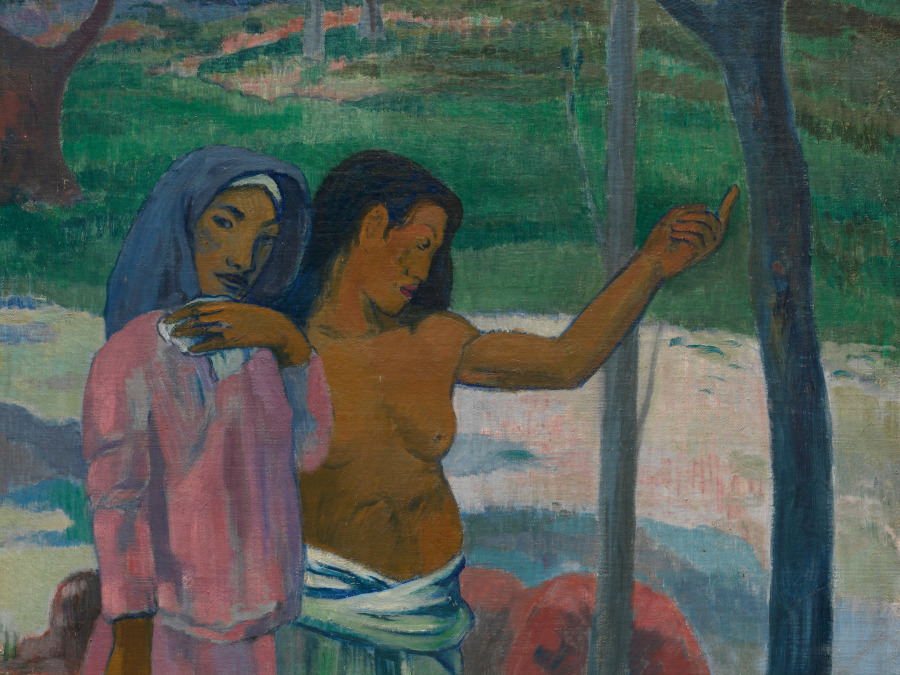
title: The Call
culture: France, late 19th-early 20th Century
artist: Paul Gauguin (French, 1848–1903)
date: 1902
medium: oil on fabric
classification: Painting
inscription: Signed lower right: P. Gauguin / 1902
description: Painted on a remote island in Polynesia a year before the artist's death, The Call belongs to a series of late works that explore the mysteries of life and death. Two women stand with bare feet, as if on sacred ground. One woman gestures to someone outside the picture, perhaps responding to a "call" from fate or destiny. Gauguin realized his ambition of painting from memory and the imagination through such mysterious, dreamlike images.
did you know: Although known as one of the founders of modern art, Gauguin found inspiration in ancient Greek, Roman, and Egyptian art. The woman with the pointing finger on the right side of this painting was taken from a figure on the Parthenon frieze.